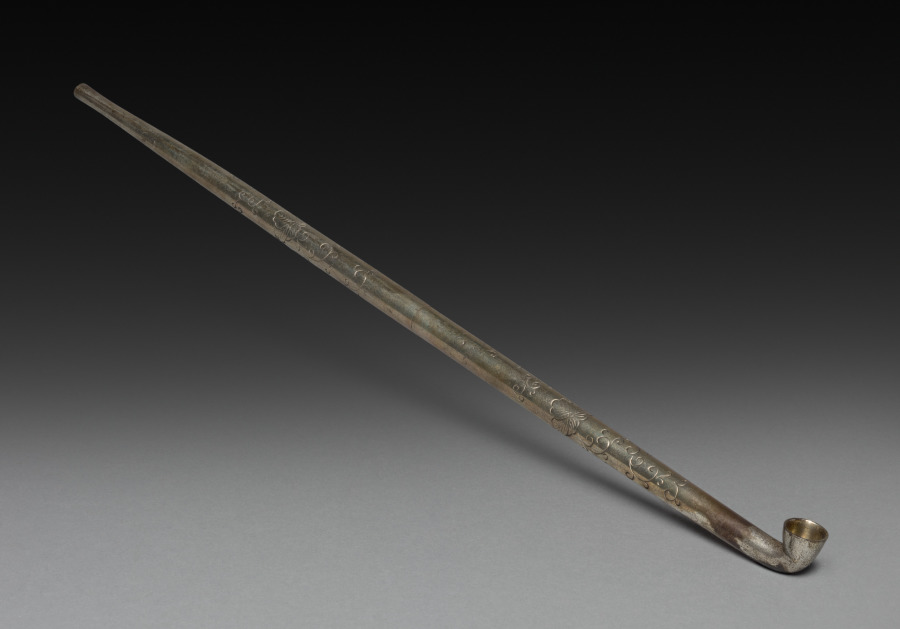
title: Tobacco Pipe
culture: Japan, Edo period (1615–1868)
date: early to mid-1800s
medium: silver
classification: Miscellaneous